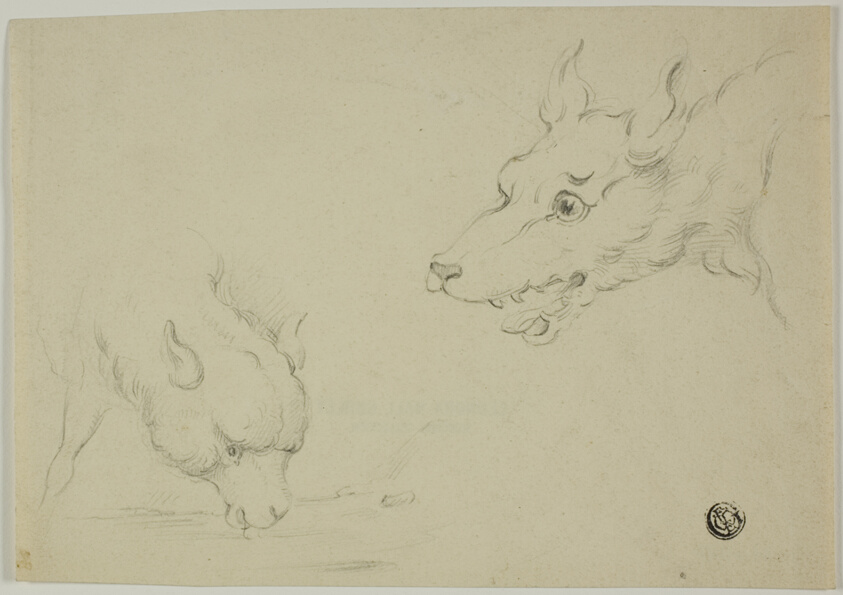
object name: Drawing and Watercolor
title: Wolf and Lamb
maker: Unknown Artist; European, 17th/19th century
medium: Graphite on cream wove paper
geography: Europe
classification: graphite; drawings (visual works); prints and drawing